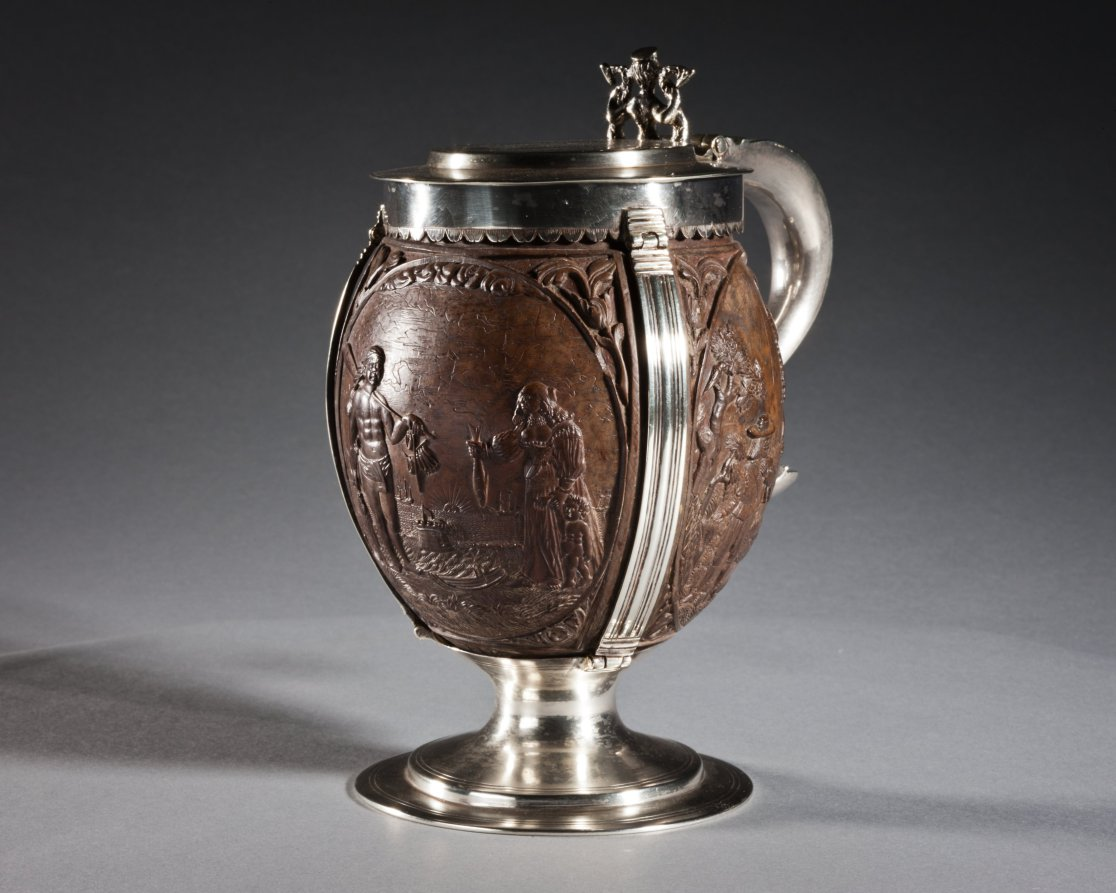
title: Coconut Cup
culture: carved coconut, probably The Netherlands; silver mount, probably England, 17th century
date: c. 1630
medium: carved coconut in silver mount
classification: Metalwork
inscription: top lid has engraved coat-of-arms, underside of lid has inscription: George Lewis TIVERTON Feby, 1st 1760.